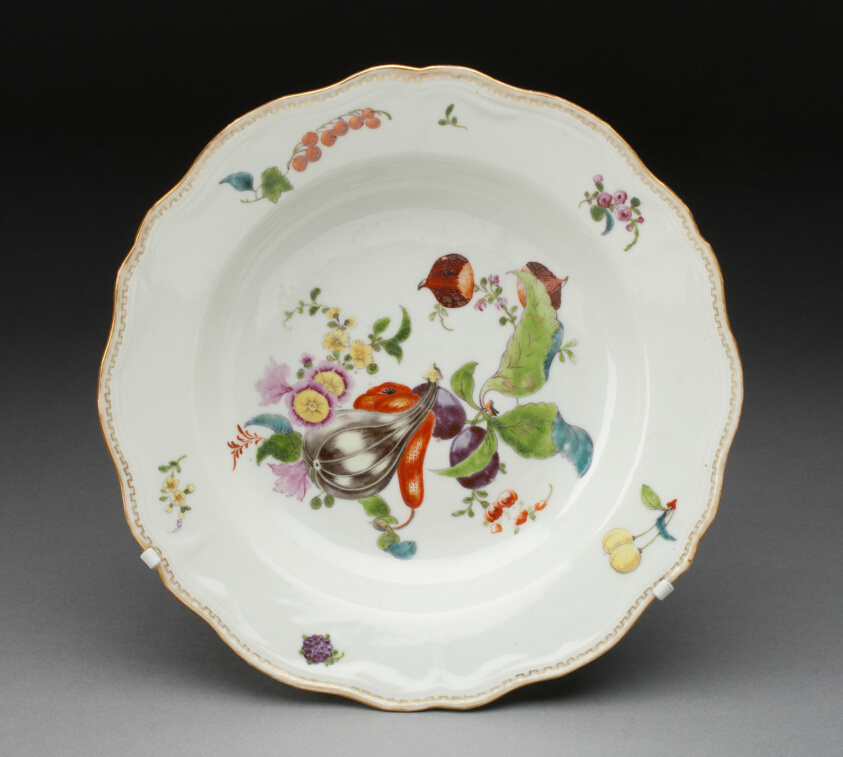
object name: Ceramics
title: Soup Bowl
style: chinese export, Chinese (culture or style), East Asian, asian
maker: China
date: c. 1750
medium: Hard-paste porcelain with polychrome enamels and gilding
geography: Jingdezhen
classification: bowl; dish (vessel); chinese export porcelain; porcelain; european decorative arts; ceramics